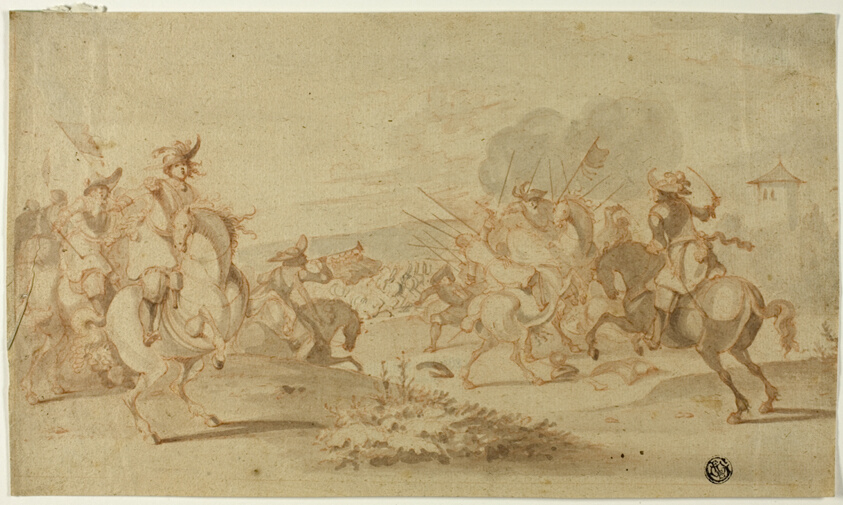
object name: Drawing and Watercolor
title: Cavalry in Battle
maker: Philipw Wouwerman (Dutch, 1619-1668); or possibly Adam Frans van der Meulen (Flemish, 1632-1690)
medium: Red chalk, with brush and gray and brown wash, on buff laid paper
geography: Holland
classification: chalk; drawings (visual works); prints and drawing